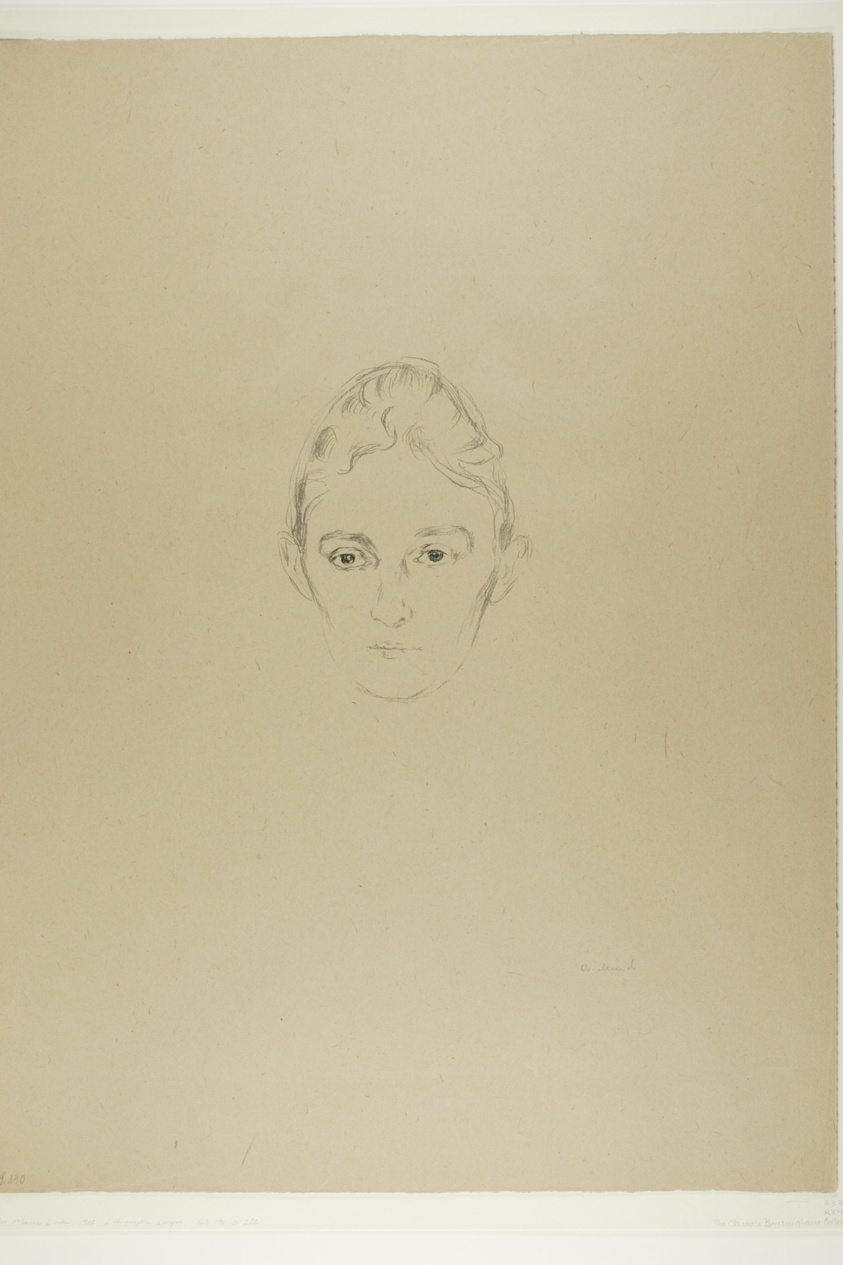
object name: Print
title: Mrs. Marie Linde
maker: Edvard Munch (Norwegian, 1863-1944)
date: 1902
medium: Lithograph on paper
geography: Norway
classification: lithograph; print; prints and drawing